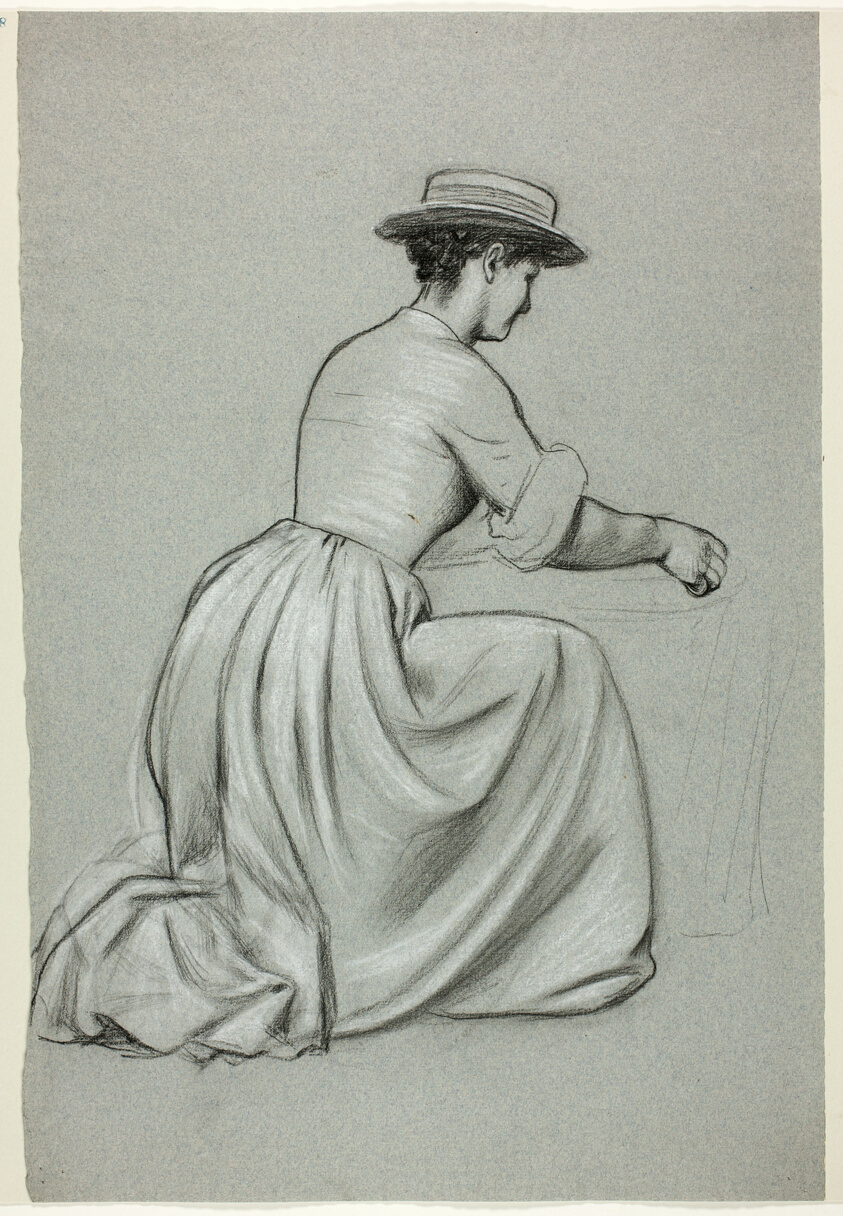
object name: Drawing and Watercolor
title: Kneeling Woman with Straw Hat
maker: Henry Stacy Marks (English, 1829-1898)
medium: Black pastel, heightened with white pastel, on blue laid paper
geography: England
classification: pastel; drawings (visual works); prints and drawing